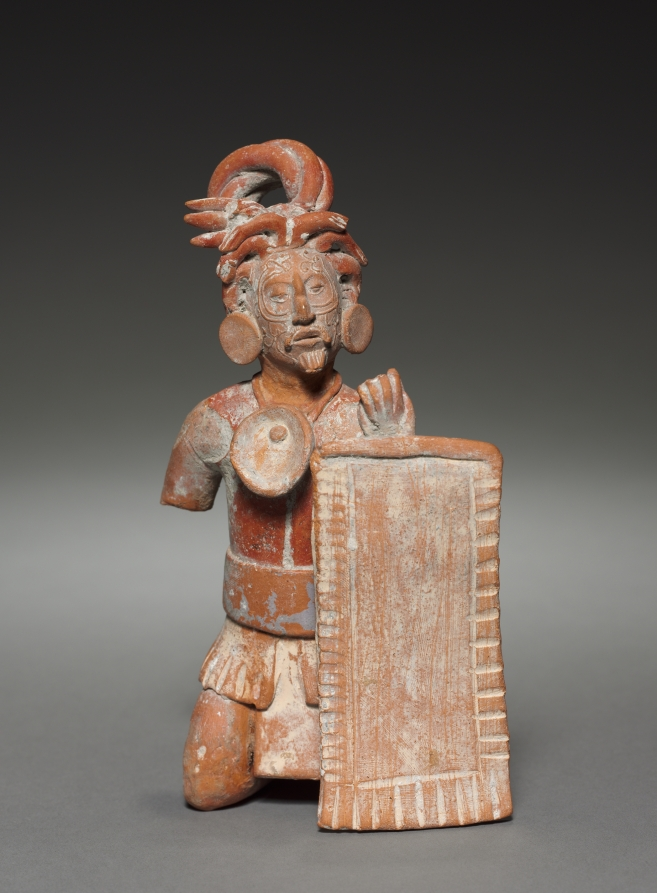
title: Warrior Figurine with Shield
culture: Mexico, Classic Maya, Jaina style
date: 600–900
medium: molded and modeled pottery with traces of pigment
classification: Sculpture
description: Maya figurines portray a wide range of human, animals, and supernatural beings. This example represents a kneeling warrior who holds a rectangular shield and wears elaborate ornaments, including huge ear spools. The expressive, delicate head was made in a mold; the body was hand modeled.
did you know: Elaborate facial tattoos and a bivalve pendent identify this warrior as a sajal, a second-tier noble.